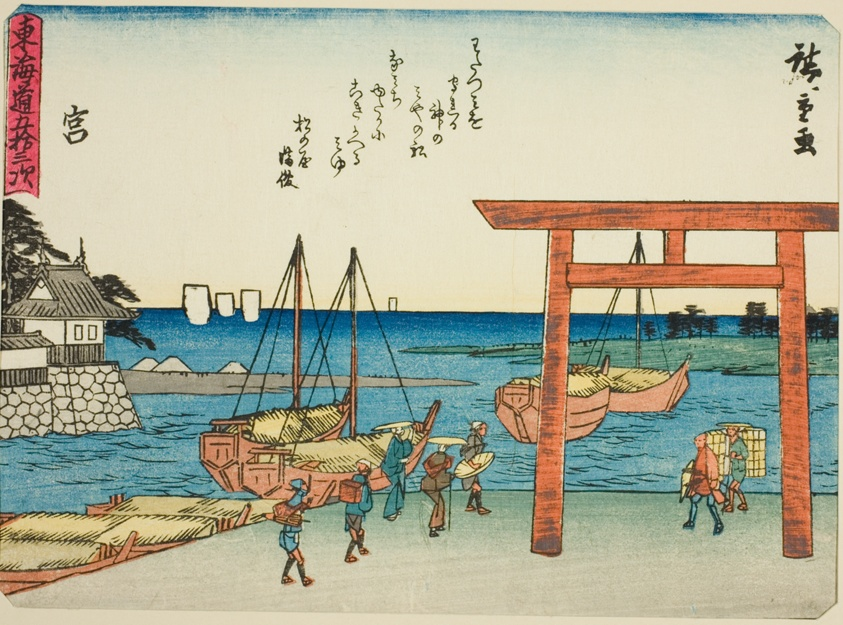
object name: Print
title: Miya, from the series "Fifty-three Stations of the Tokaido (Tokaido gojusan tsugi)," also known as the Tokaido with Poem (Kyoka iri Tokaido)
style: Japanese (culture or style)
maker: Utagawa Hiroshige 歌川 広重; Japanese, 1797-1858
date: c. 1837/42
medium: Color woodblock print; chuban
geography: Japan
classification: woodblock print; print; asian art